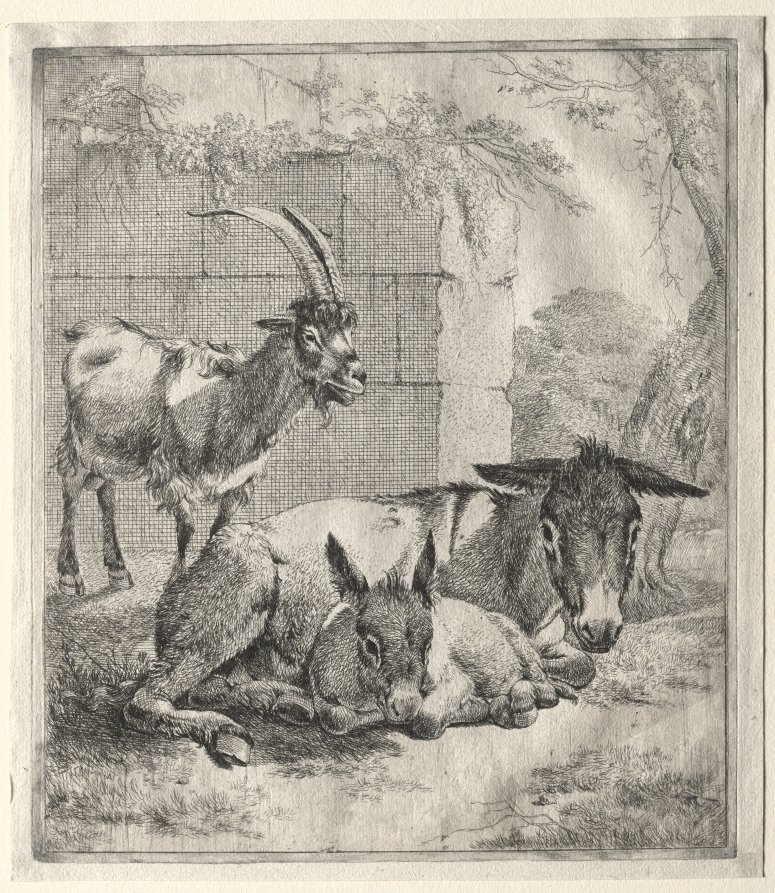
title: Goat and Donkeys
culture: Germany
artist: Johann Heinrich Roos (German, 1631–1685)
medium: etching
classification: Print